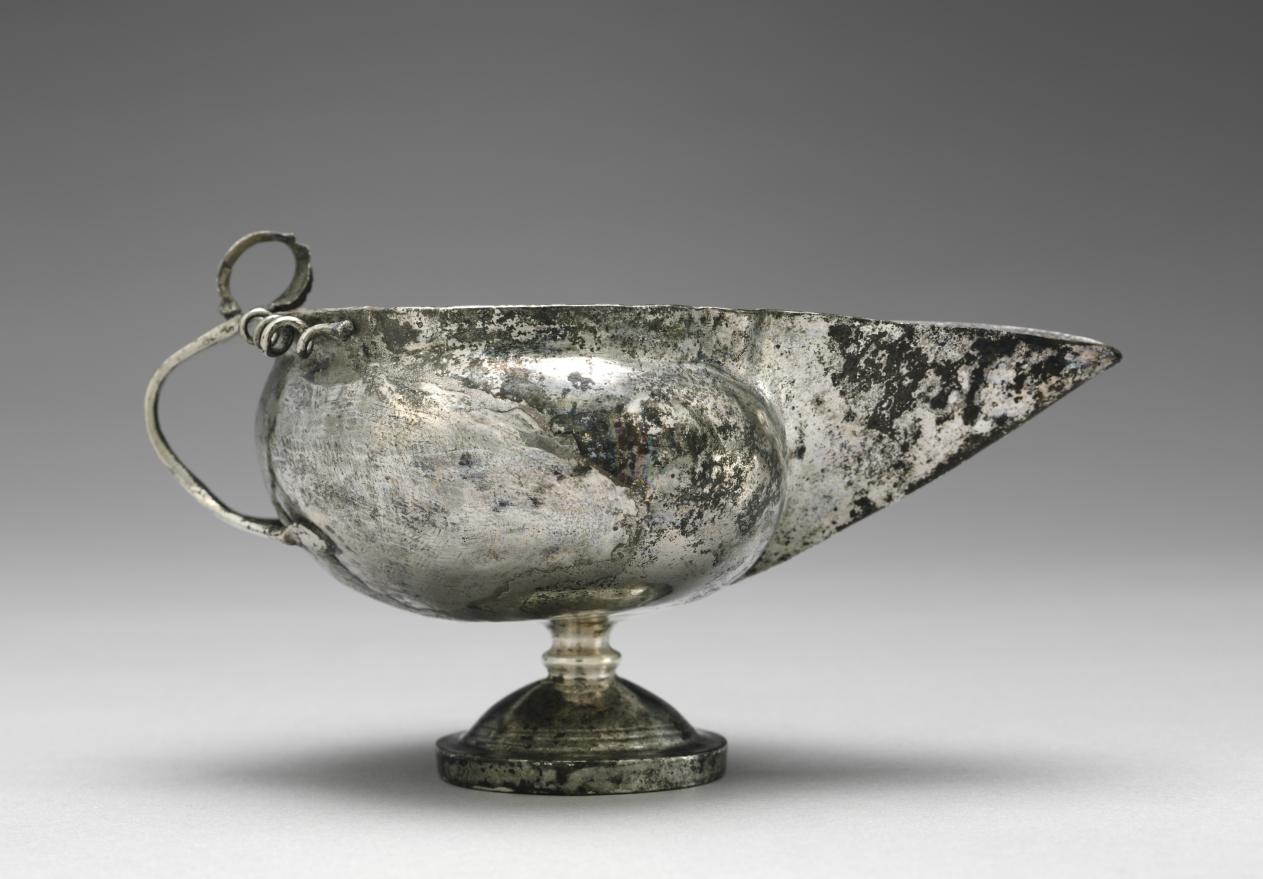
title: Spouted Pitcher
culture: Byzantium, Syria(?), Byzantine period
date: 300–600 CE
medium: silver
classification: Metalwork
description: A large quantity of tableware survives from the Roman Empire, including this piece from Antioch and the Eastern Mediterranean. Most of the recovered groups of silver seem to have been hoards concealed during times of trouble. A complete table service, called a ministerium in Latin and a synthesis in Greek, consisted of silver for eating and drinking: trays, platters, plates, dishes, spoons, pepper dispensers, goblets, pitchers, ladles, and bowls. The god of wine, Dionysos, was frequently depicted on drinking and eating vessels.